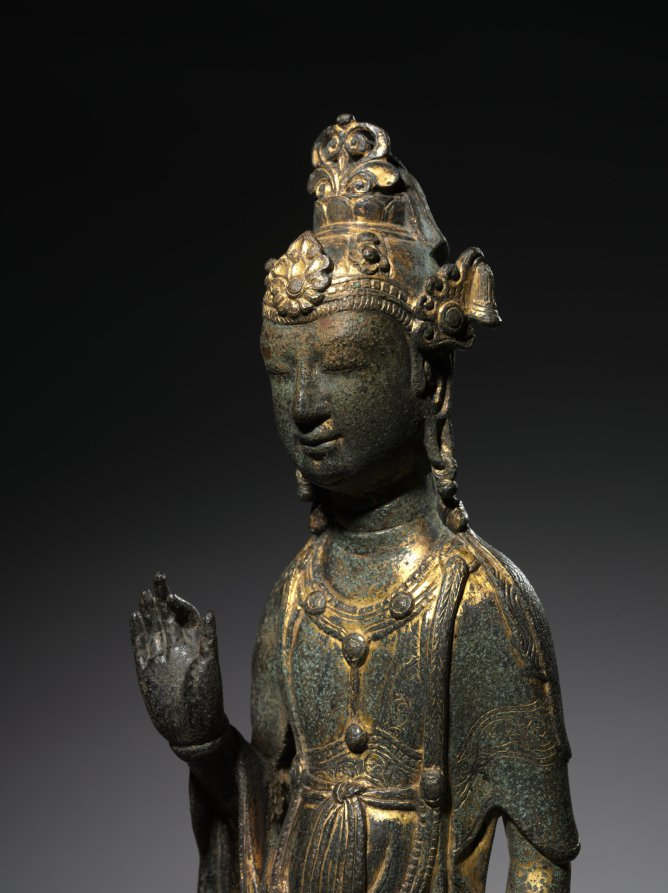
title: Bodhisattva Guanyin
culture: China, Liao dynasty (916-1125)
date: 900s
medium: gilt bronze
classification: Sculpture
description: In Buddhism, a bodhisattva is a being who, just before reaching enlightenment, turns back to assist others to reach enlightenment first. This bodhisattva holds his hand palm forward, in a gesture that tells followers not to fear. In his other hand he carries a bottle that holds the elixir of immortality.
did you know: The Liao rulers were devout Buddhists who commissioned substantial religious projects.